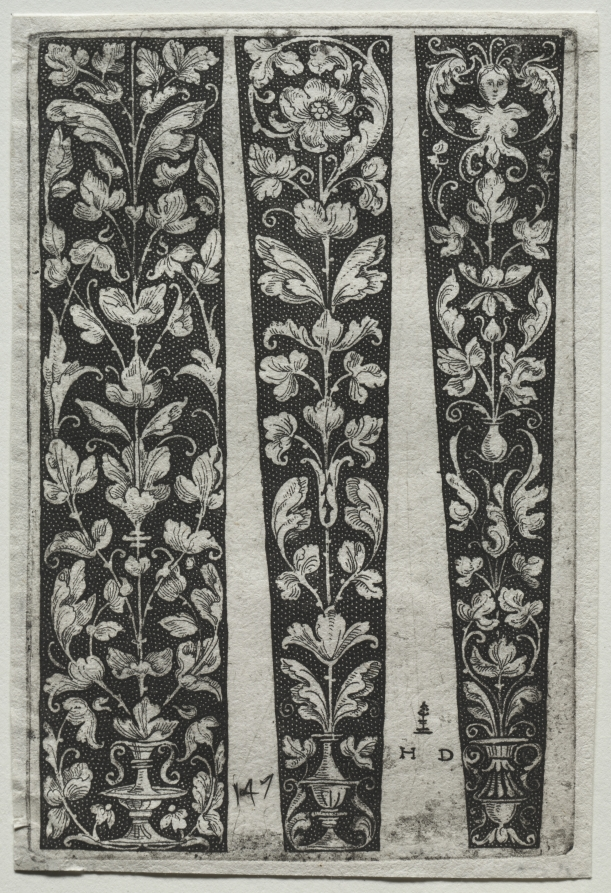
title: Ornament Fillet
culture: Germany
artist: Daniel Hopfer (German, c. 1470–1536)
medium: engraving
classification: Print